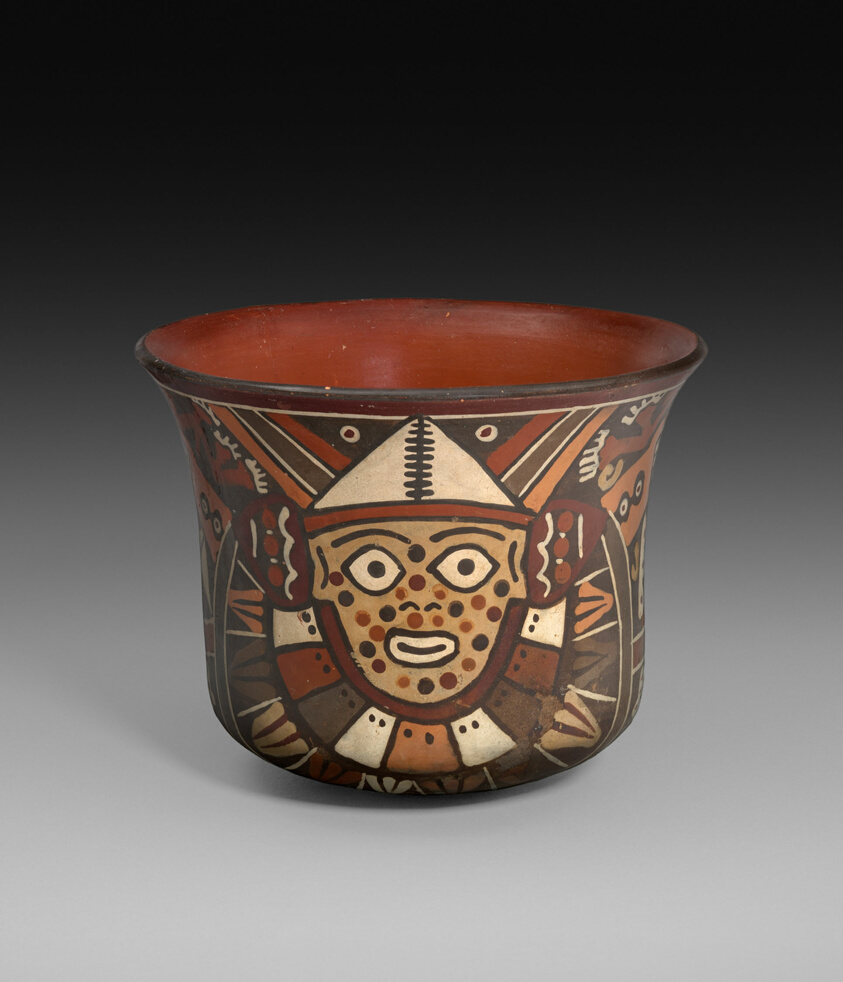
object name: Vessel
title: Bowl Depicting a Harvest-Festival Figure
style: nazca, early intermediate period, Pre-Columbian, americas, andes, Arts of the Americas, andean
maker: Nazca; South coast, Peru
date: 180 BCE–500 CE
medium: Ceramic and pigment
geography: Peruvian South Coast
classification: bowl; earthenware; art of the americas; ceramics; vessel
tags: people, landscapes, agriculture, ritual